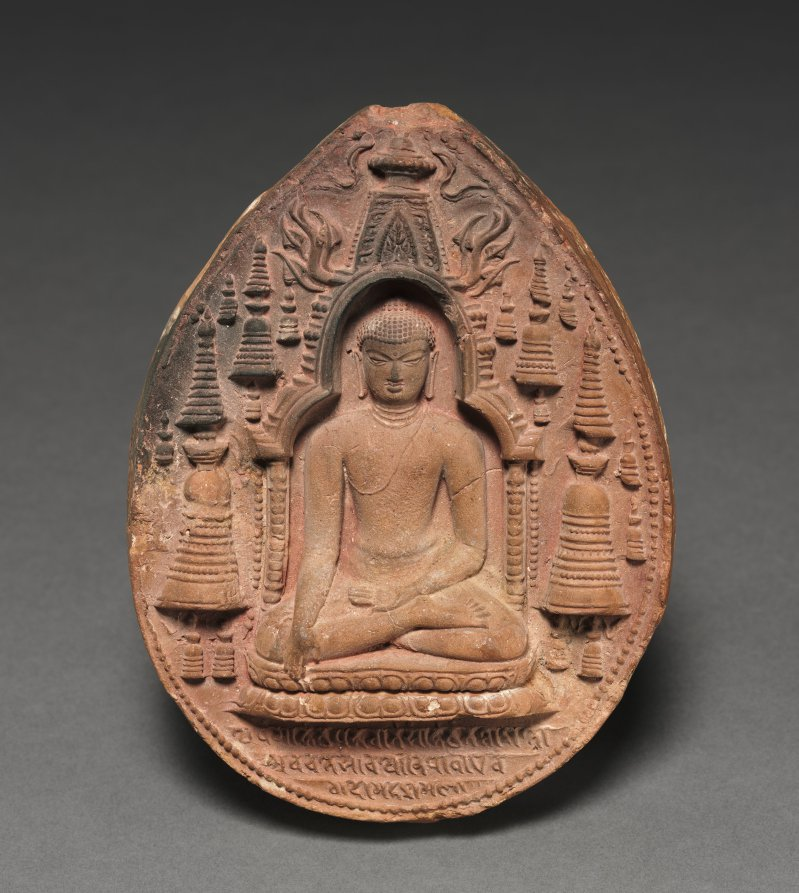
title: Votive Plaque with Figure of the Buddha, Temple at Bodhgaya, and Stupas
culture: India, Bihar, Bodhgaya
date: 800s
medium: terracotta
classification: Sculpture